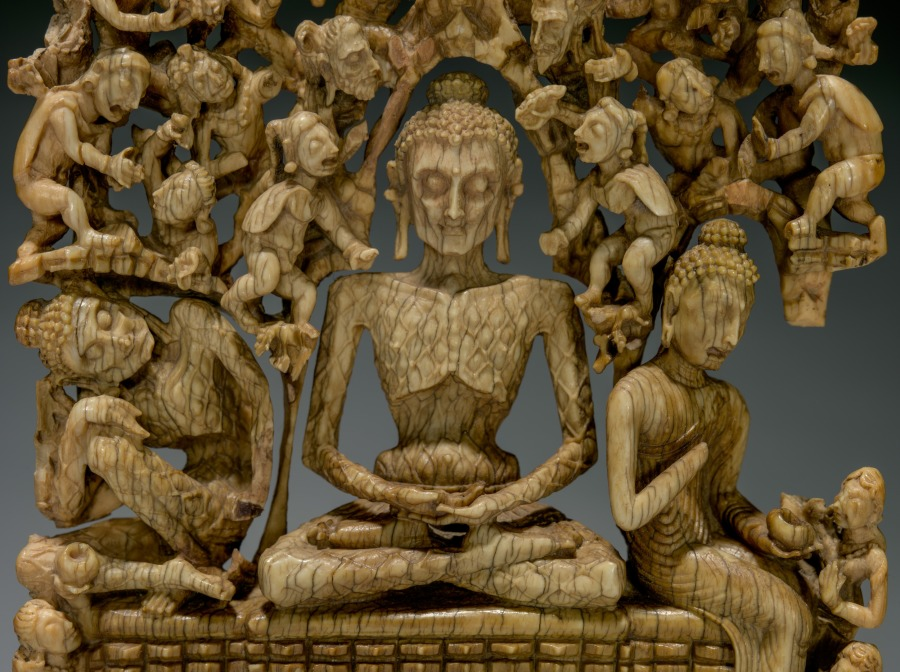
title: Fasting Buddha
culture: India, Kashmir, 8th century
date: 700s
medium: ivory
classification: Ivory